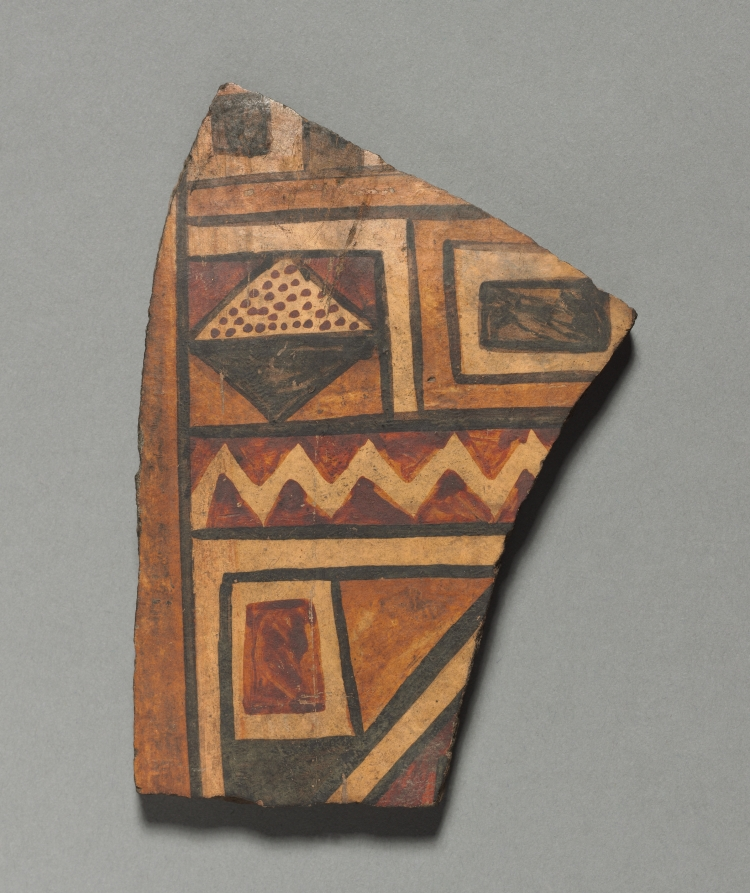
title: Fragment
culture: Peru, Inca, 1400-1532 AD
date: 1400–1532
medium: pottery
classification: Ceramic